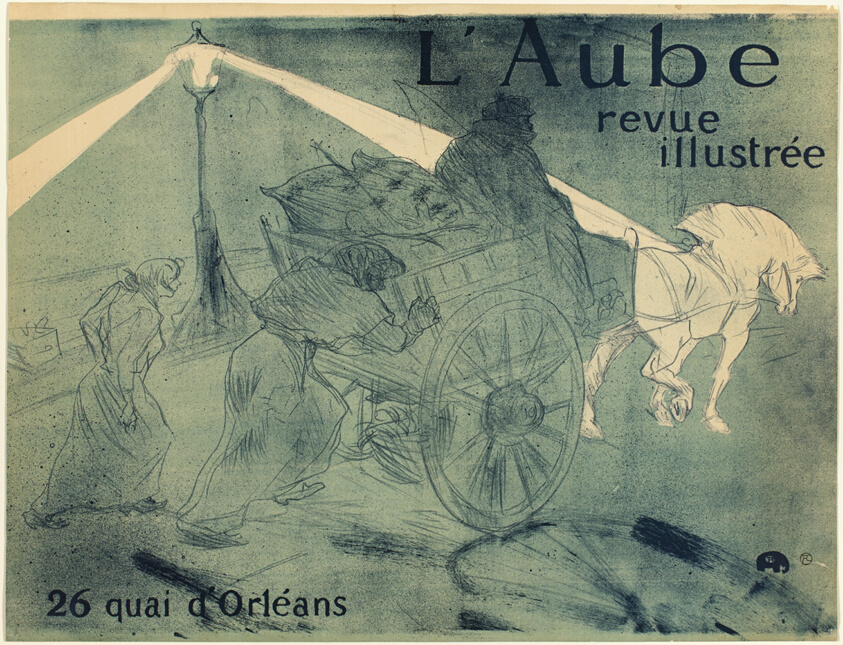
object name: Print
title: L'Aube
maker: Henri de Toulouse-Lautrec (French, 1864-1901)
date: 1896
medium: Color lithograph poster on cream wove paper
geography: France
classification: lithograph; print; prints and drawing; poster